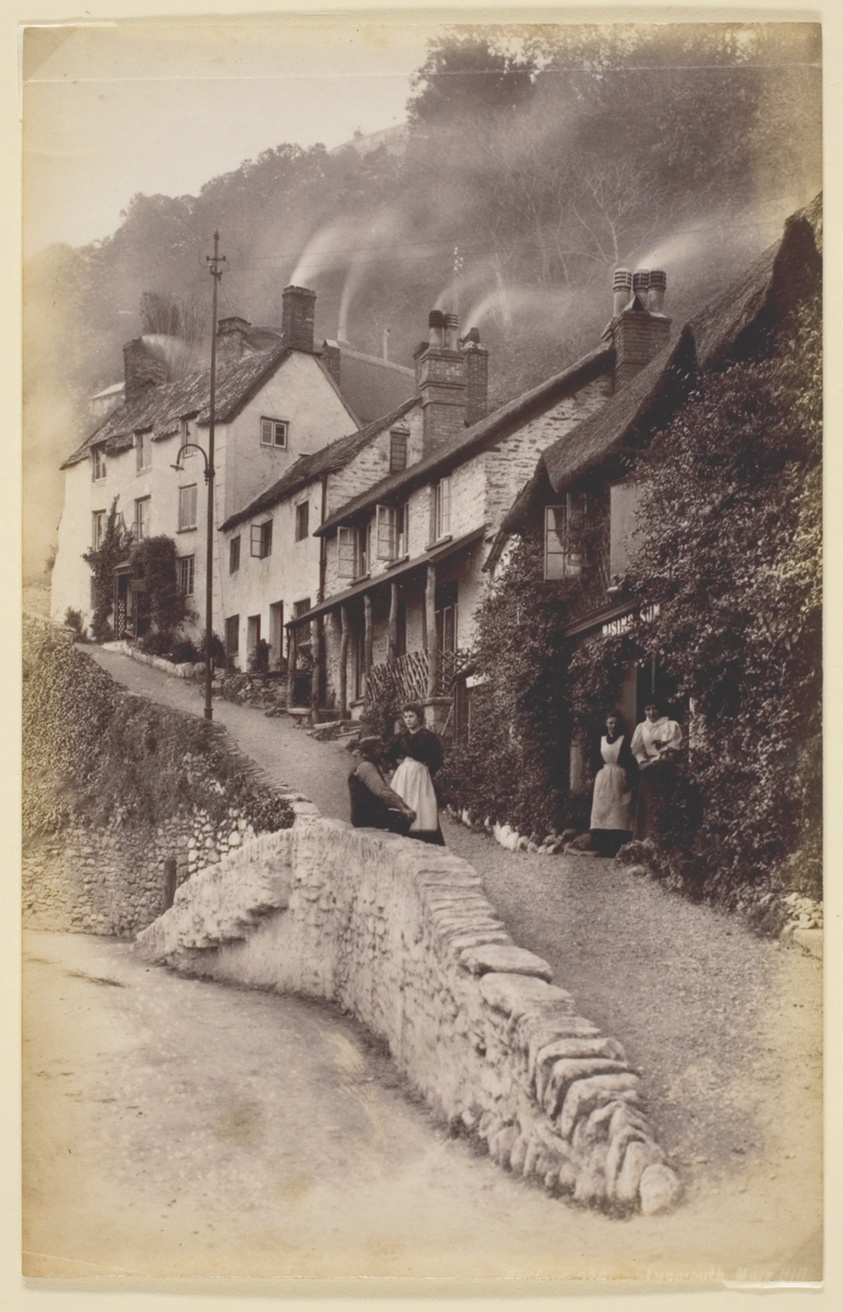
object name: Photograph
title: Lusmouth, Mars Hill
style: 19th century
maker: Francis Bedford (English, 1816–1894)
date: 1860/94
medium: Albumen print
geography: England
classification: albumen silver print; photographic process; photography; photograph